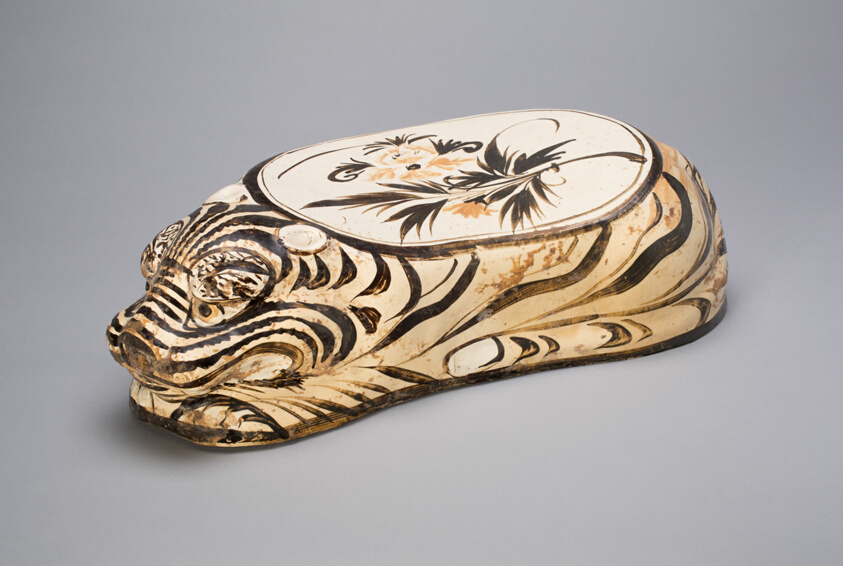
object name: Sculpture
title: Tiger-Shaped Pillow with Floral Spray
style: Chinese (culture or style)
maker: China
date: Jin dynasty (1115–1234), 12th/13th century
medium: Cizhou ware; slip-coated earthenware with underglaze iron brown and amber painting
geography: China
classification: stoneware; asian art; ceramics; sculpture